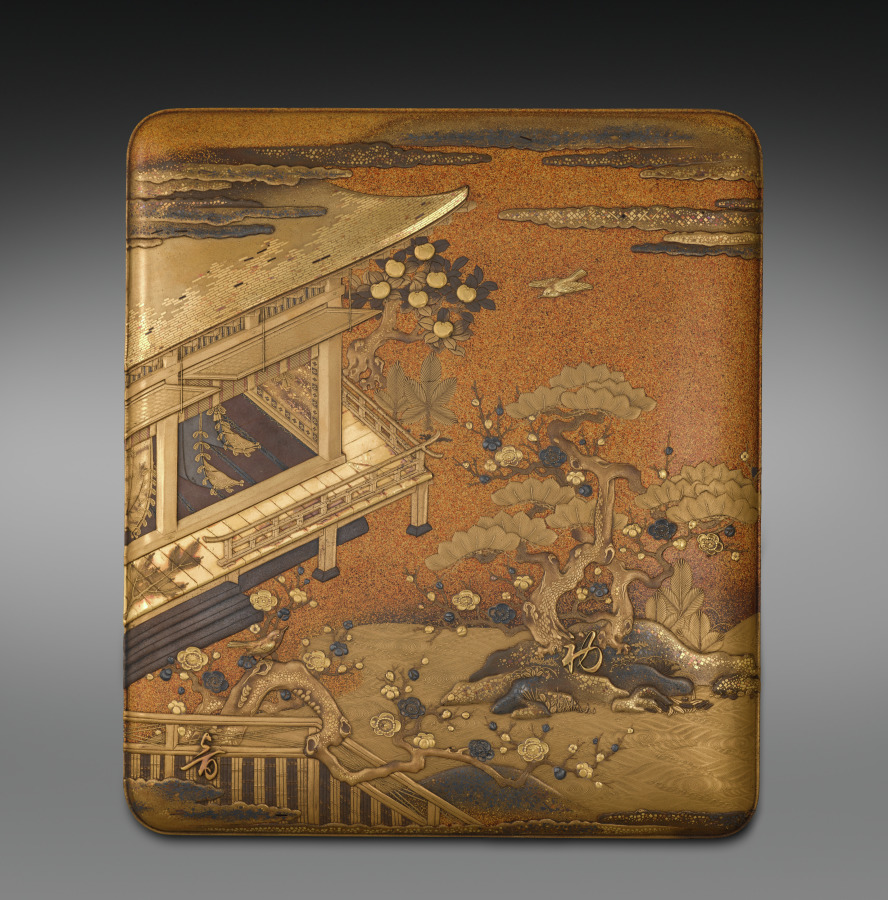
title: Writing Box (Suzuribako) with the “First Song” (Hatsune) Chapter from the Tale of Genji (lid)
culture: Japan, Meiji period (1868–1912)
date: early 1900s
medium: Lacquered wood with gold and silver sprinkled powder (maki-e), foil application (kirikane), and metal inlay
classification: Lacquer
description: The design of this box was inspired by an object in the 1639 lacquer wedding set of Chiyohime, the daughter of the shogun (ruler). Information about the set became available in the Meiji period, leading some lacquer artists to emulate its designs. This box features a scene from the chapter “First Song” (Hatsune) of the Tale of Genji, in which Prince Genji and his love Murasaki enjoy her garden. It incorporates the written characters for “first” (初, hatsu) and “sound” (音, ne), indicating the first song of the warbler in spring, associated with the new year—the water dropper for mixing the ink is in the shape of this bird.